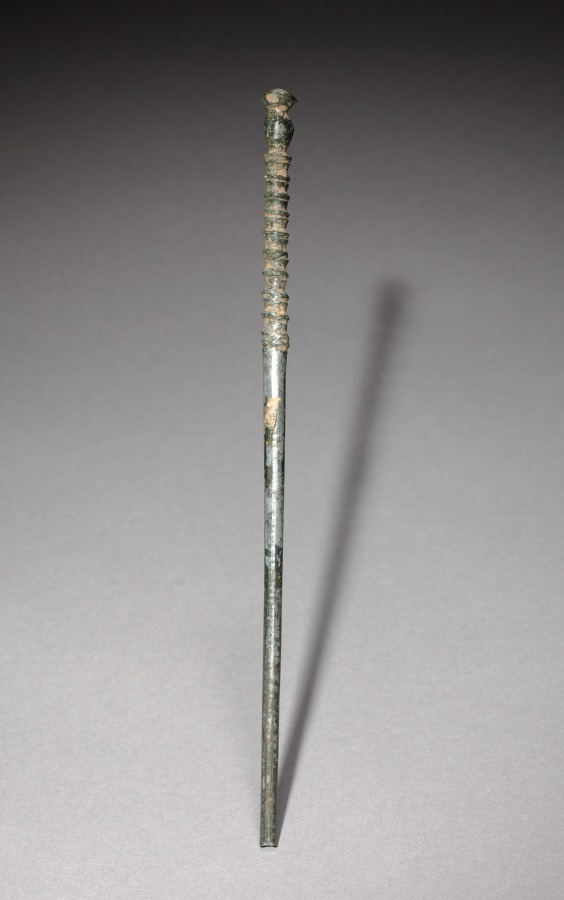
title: A Pair of Chopsticks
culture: Korea, Goryeo dynasty (918–1392)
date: 918–1392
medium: bronze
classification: Metalwork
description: In Korea, chopsticks made of metal such as brass, silver, and gold were excavated from ancient tombs and ruins dated to the 6th century at the earliest. Burial goods often include utilitarian objects such as table wares and utensils because the dead were believed to need them in the afterlife.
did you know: In contrast to the Chinese and Japanese, Koreans still prefer metal chopsticks (stainless steel and brass) to wooden ones.